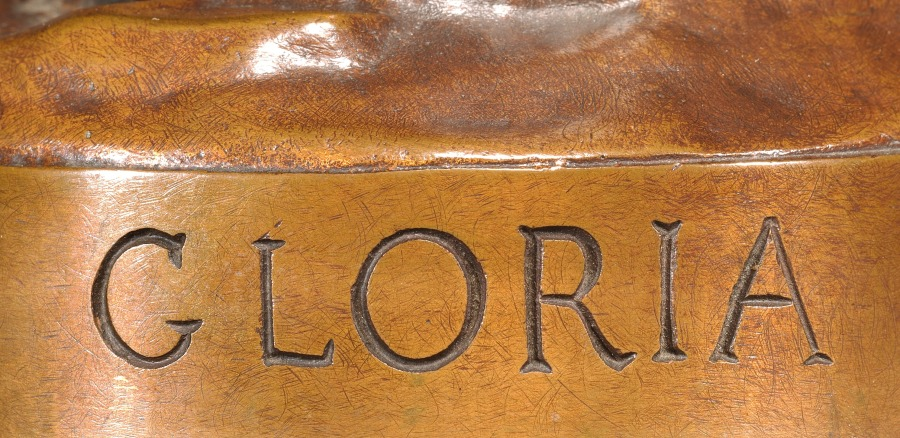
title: Gloria Victis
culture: France, 19th century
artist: Antonin Mercié (French, 1845–1916)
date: c. 1880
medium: bronze with gilding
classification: Sculpture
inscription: Signed near foot at right: "A. MERCIE."; inscribed rear: "F. BARBEDIENNE. FONDEUR."; inscribed front of base: "GLORIA VICTIS."